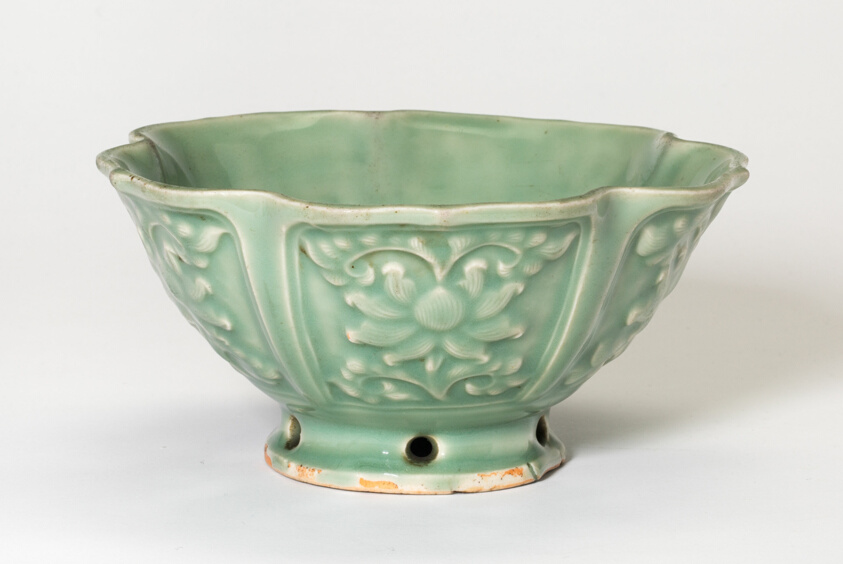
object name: Vessel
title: Foliate Bowl with Lotus Flowers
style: Chinese (culture or style)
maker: China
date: Ming dynasty (1368–1644)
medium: Celadon-glazed porcelain with underglaze molded and incised decoration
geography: China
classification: bowl; stoneware; dish (vessel); asian art; ceramics; vessel